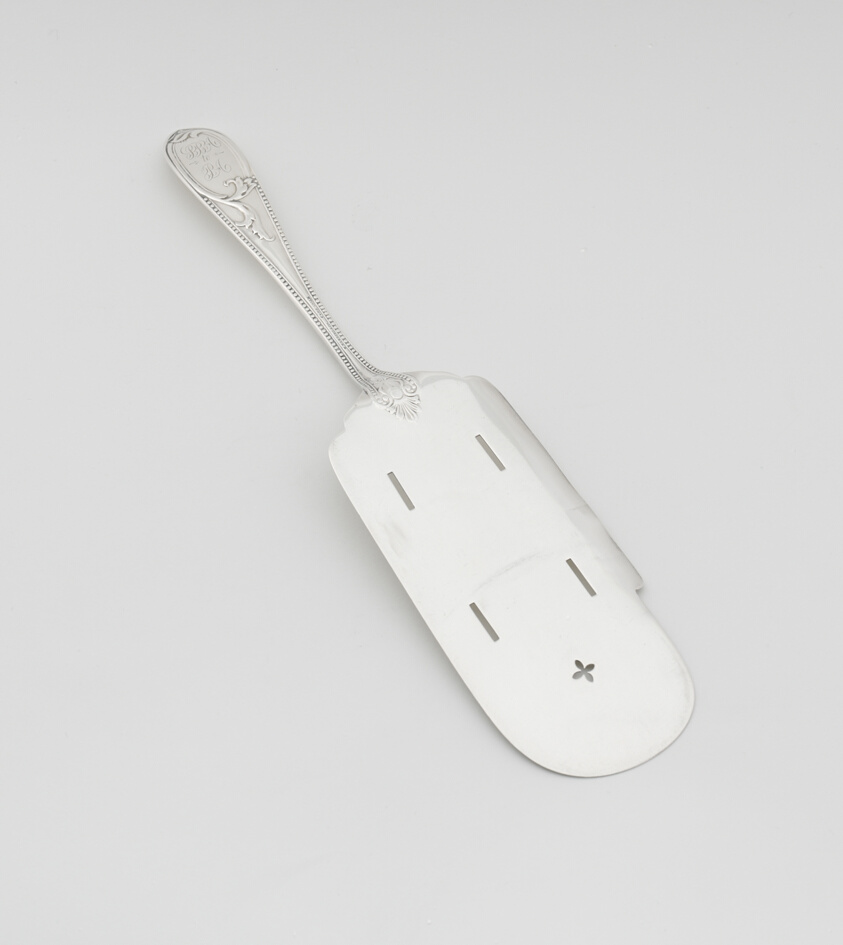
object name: Metalwork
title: Fish Slice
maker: Newell Harding & Co.; American, 1859–1862; Haverhill, Massachusetts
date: c. 1830–60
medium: Silver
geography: Boston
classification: utensil for serving food; silver; utensil; american decorative arts; american arts; decorative arts